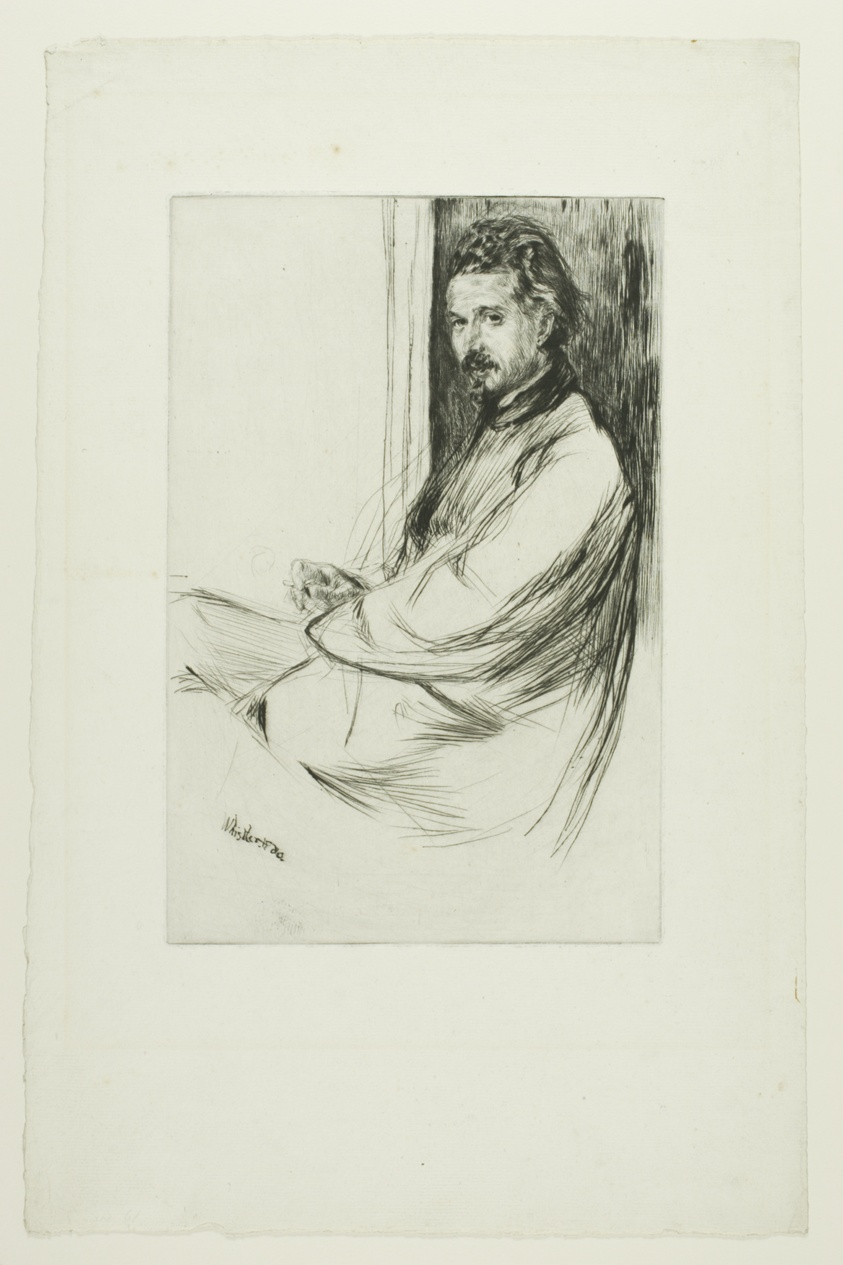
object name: Print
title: Axenfeld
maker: James McNeill Whistler (American, 1834-1903)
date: 1860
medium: Drypoint in black ink on ivory laid paper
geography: United States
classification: drypoint; print; prints and drawing; paper